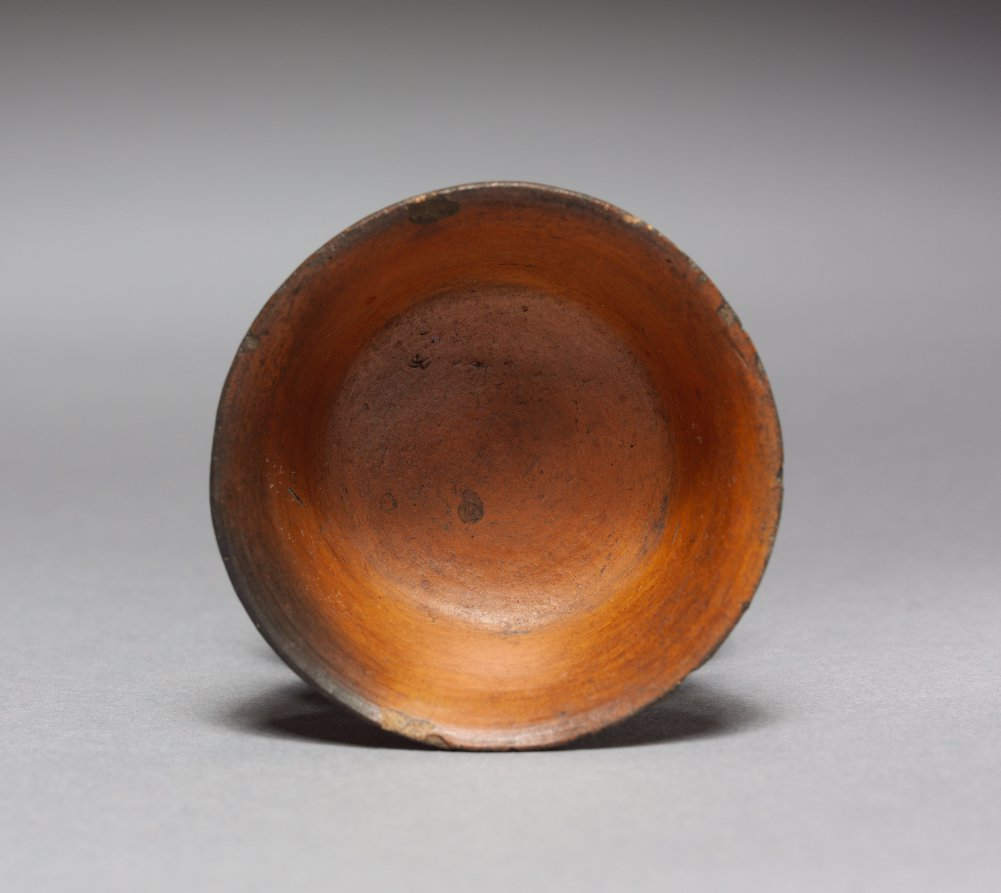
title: Dish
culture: Mexico, 16th century or earlier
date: before 1521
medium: terracotta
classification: Ceramic